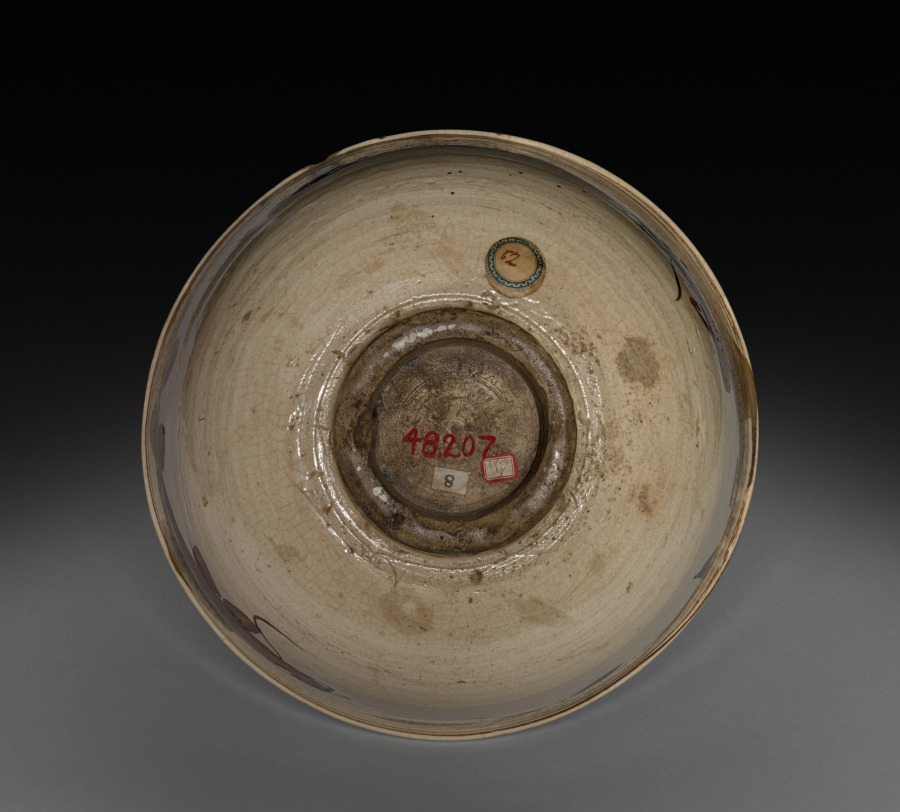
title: Bowl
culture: China, Ming dynasty (1368–1644)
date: 1368–1644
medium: stoneware, Cizhou ware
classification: Ceramic